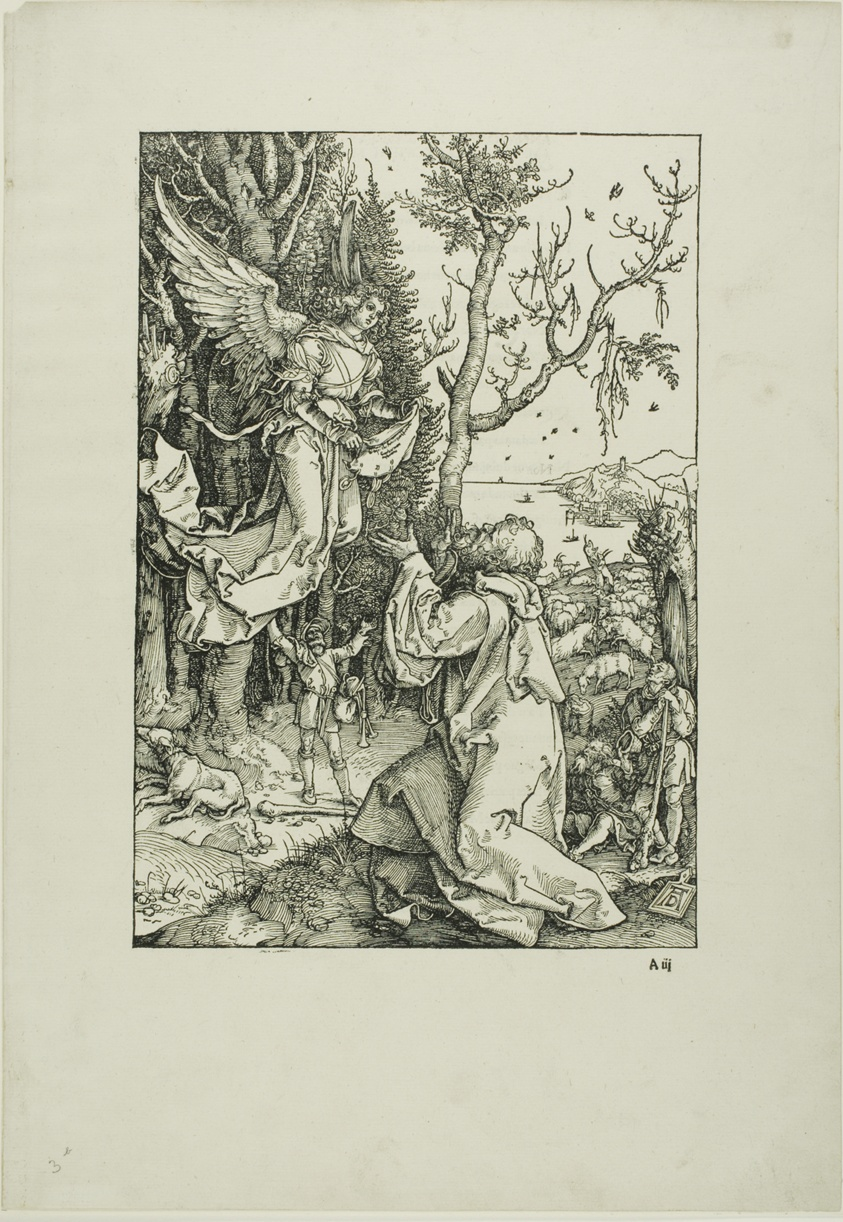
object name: Print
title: Joachim and the Angel, from The Life of the Virgin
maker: Albrecht Dürer (German, 1471-1528)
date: c. 1504, published 1511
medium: Woodcut in black on ivory laid paper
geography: Germany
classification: woodcut; print; prints and drawing; paper